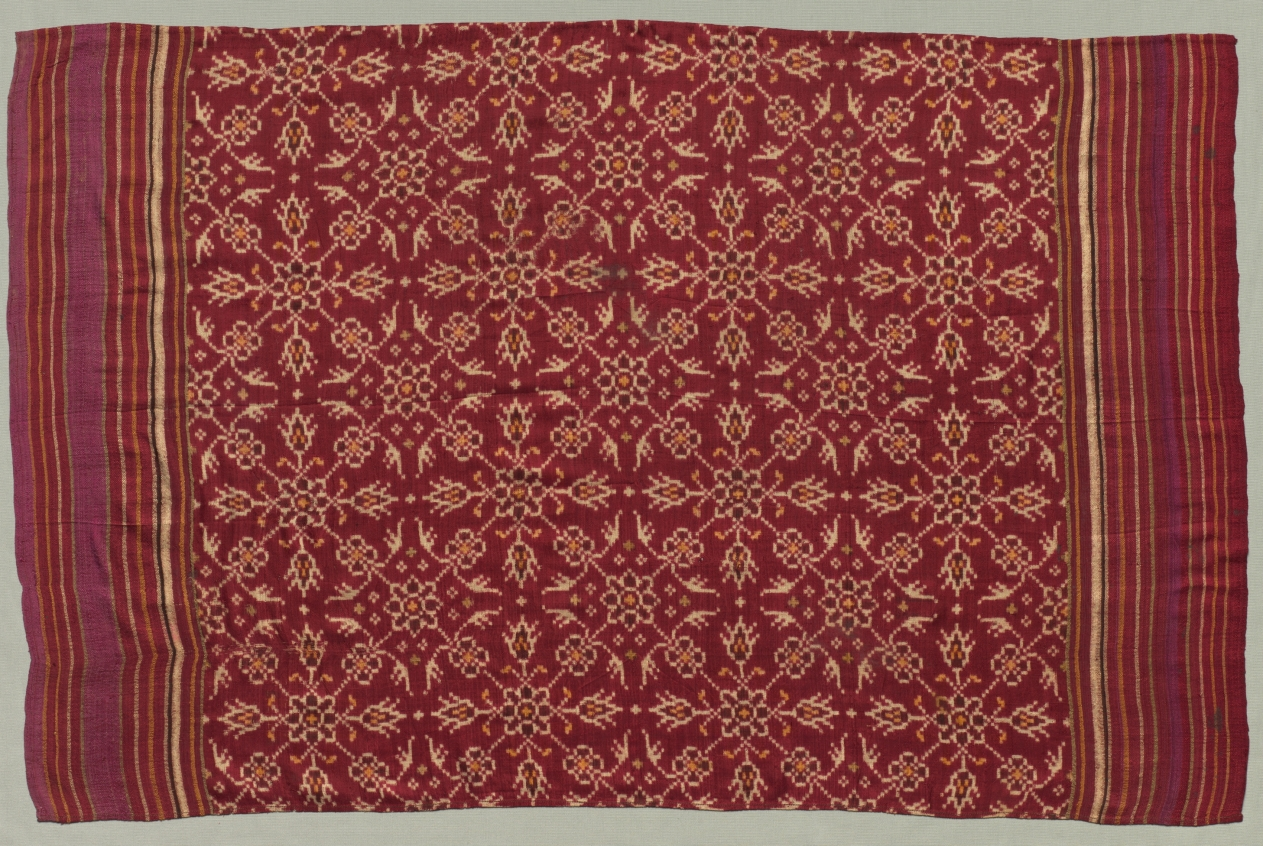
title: Fragment of Silk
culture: India, early 20th century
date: early 1900s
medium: tabby weave, double ikat; silk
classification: Textile